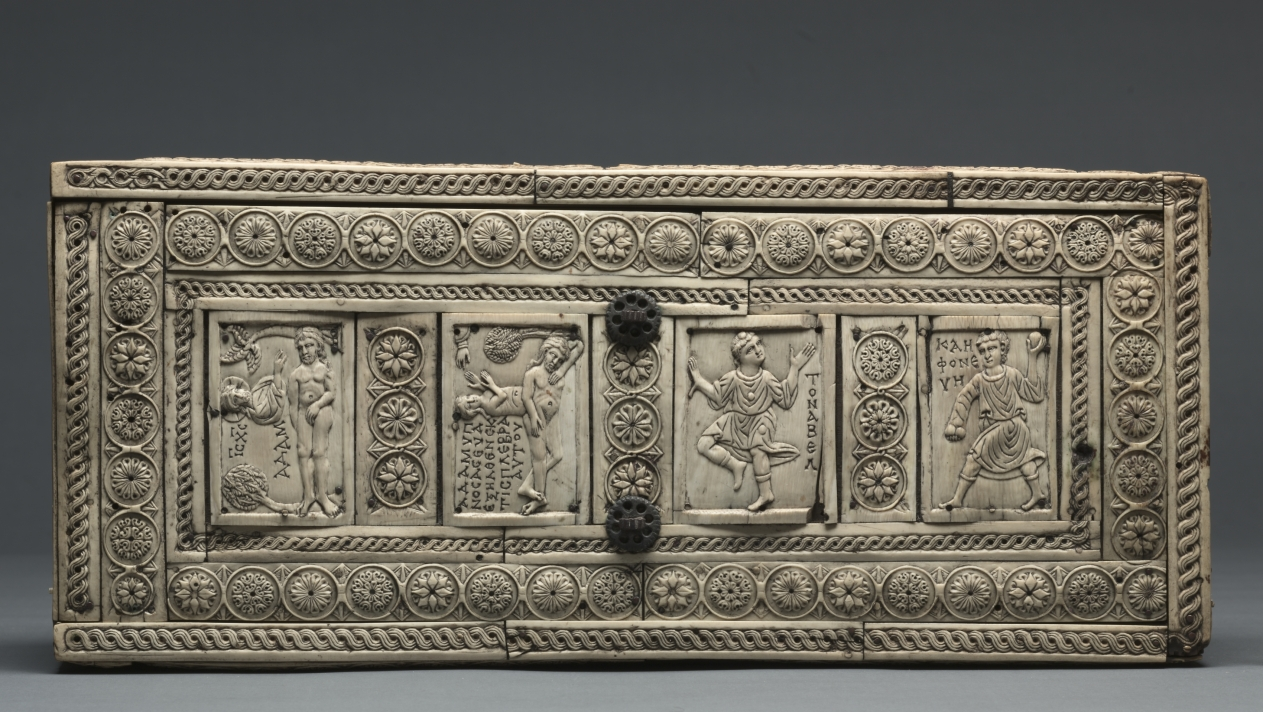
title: Ivory Box with Scenes of Adam and Eve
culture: Byzantium, Constantinople, Byzantine period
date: 1000–1100s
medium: ivory, wood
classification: Ivory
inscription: Greek inscriptions are included in each plaque.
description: Scenes from the Old Testament stories of Adam and Eve and their children, Cain and Abel, decorate this box, which may have been made to contain jewelry or small valuables. On its lid two plaques depict the creation of Adam and the creation of Eve from Adam’s rib. Two further plaques depict Cain slaying Abel: Cain throws a stone in the direction of Abel, who is hit by stones in the hip, chest, and head.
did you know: Carved out of imported ivory by skilled craftsmen, boxes such as these were used by Byzantine elites to store luxury goods such as jewelry.